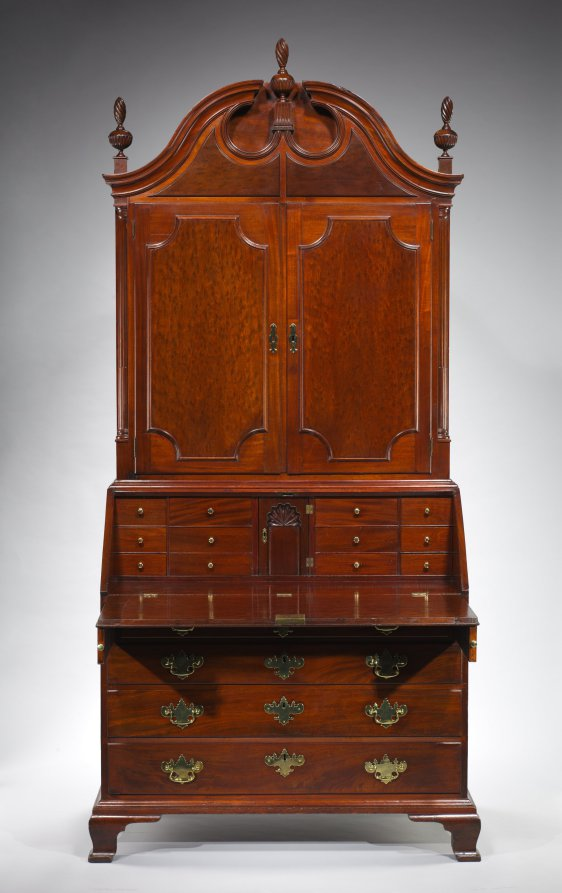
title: Desk and Bookcase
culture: America, Rhode Island, Newport, 18th century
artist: attributed to John Townsend (American, 1732–1809)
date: c. 1780–95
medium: "Plum pudding" mahogany, red cedar, chestnut, white pine, brass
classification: Furniture and woodwork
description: In the 1700s, Newport, Rhode Island, was the fifth largest city in North America and one of the most important centers of shipping and trade along the Eastern Seaboard. Orders for furniture from its celebrated cabinetmakers came in from far and wide. This desk and bookcase was likely made for Oliver Wolcott Sr., a signer of the Declaration of Independence and later governor of the State of Connecticut. Eventually, the desk passed down through his family to Dorothy Draper, an important 20th-century interior decorator, and ultimately to her daughter, Penelope Draper Buchanan, whose husband gave it to the museum after her death—a rare, unbroken line of succession. Large desks were designed to hold all the necessary components of a gentleman’s office under lock and key: books, papers, pens and ink, and important documents. To serve such a function desks also became complicated masterworks of the cabinetmaker’s art, incorporating many parts from small drawers to large panels cut from a single tree, making them among the most expensive types of furniture available. This desk and bookcase exhibits the characteristic traits of classic Newport furniture—“plum pudding” mahogany, cupcake-like finials, and a carved shell on the inside of the desk.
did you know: This desk and bookcase was likely made for Oliver Wolcott Sr., a signer of the Declaration of Independence and later governor of Connecticut.